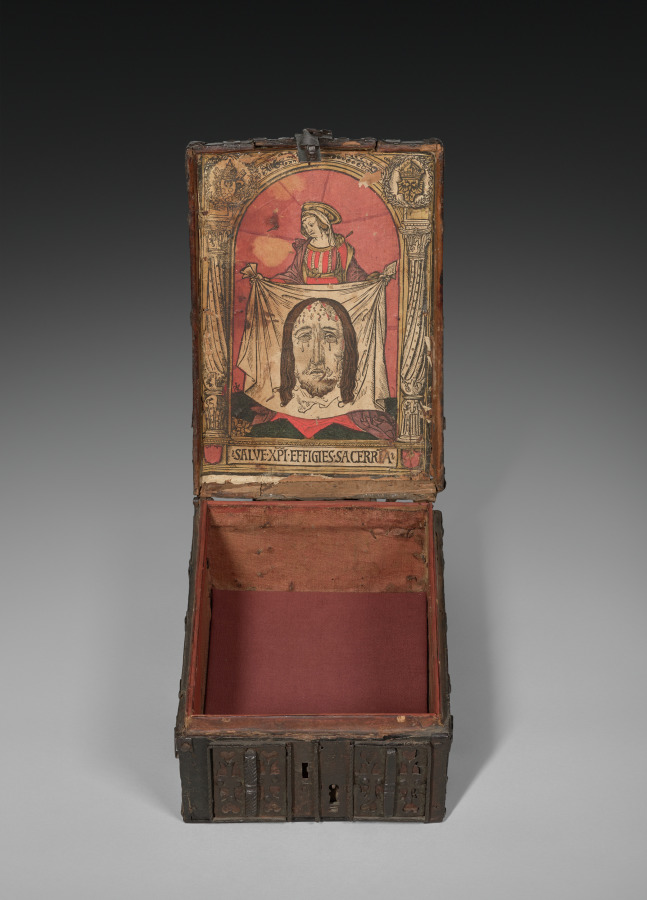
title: Coffret with Woodcut of Saint Veronica's Vernicle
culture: Coffret: France, probably Paris; Woodcut: Germany, Augsburg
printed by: Hans Burgkmair the Elder (German, 1473–1531)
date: Coffret: c. 1515; Woodcut: c. 1509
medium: Wood, leather, iron, textile, woodcut with stenciled coloring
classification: Print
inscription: SALVE. XPI. EFFIGIES. SACERRI[M]A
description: This remarkable object is thought to have functioned as a traveling case to keep small valuables and books, as well as a provisional altar. Made in France around 1515, the interior lid is affixed with a devotional woodcut made in Germany, imported, and colored for the purpose. Featuring an image of the veil of Saint Veronica, the text at the bottom of the woodcut guides the user in prayer to the holy image of Christ’s face which has been miraculously imprinted on the veil, an action that held promise of indulgences (a reduction in one’s punishment for sins). Presumably, the owner carried the box on a journey, retrieved a prayer book from inside, and propped it open in order to practice daily prayers.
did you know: A secret compartment on the top lid of this coffer may have held a relic, consecrated host, or valuable document.